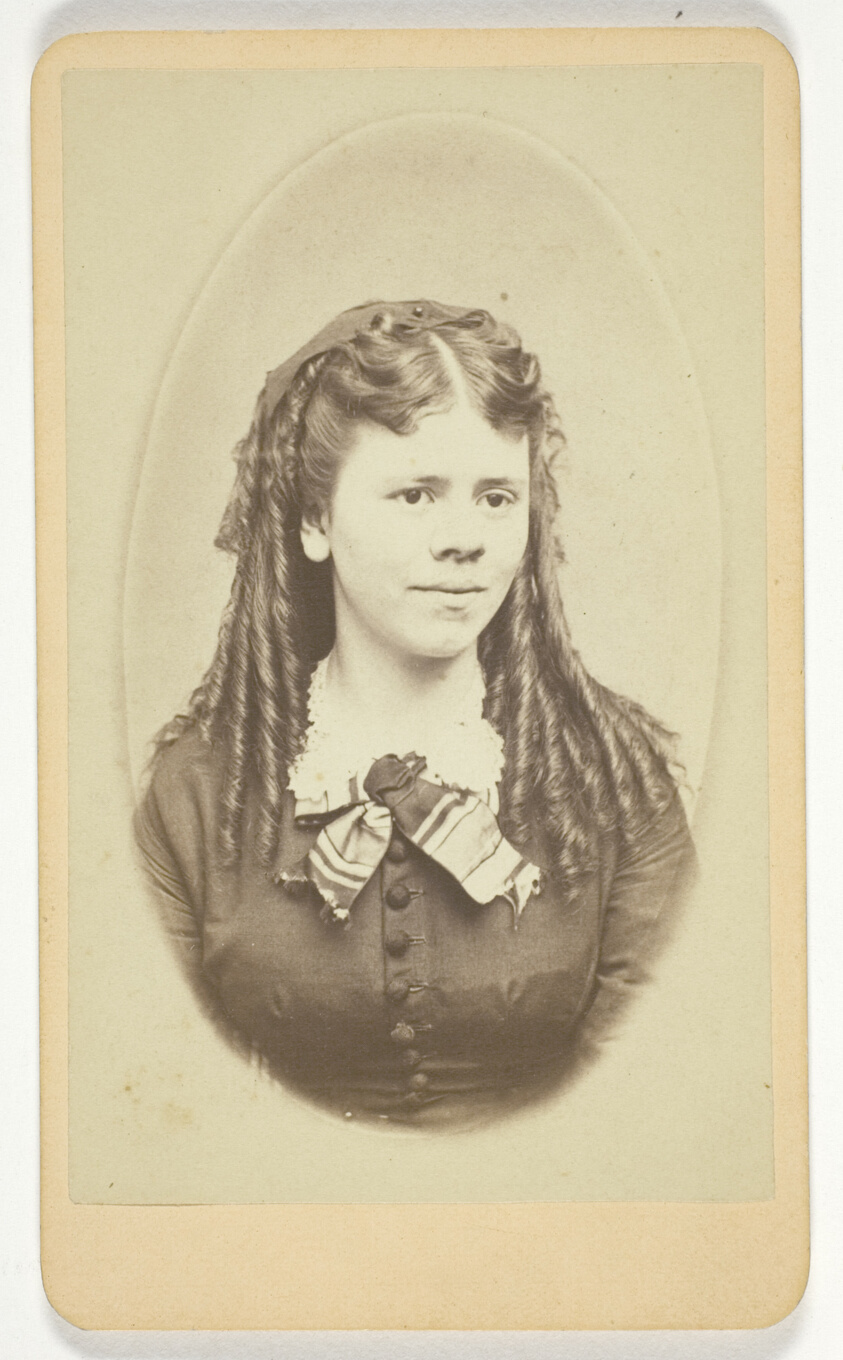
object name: Photograph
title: Untitled (Portrait of Woman)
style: 19th century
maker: G. C. Gilchrest (American, 19th century)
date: 1850/99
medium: Albumen print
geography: United States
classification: photography; photograph